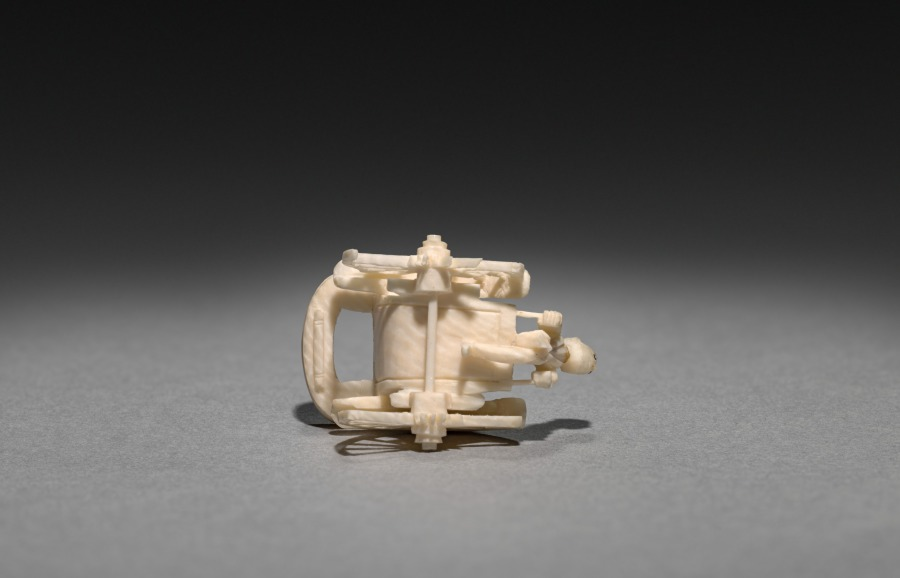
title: Woman in a Jinrikisha (Rickshaw)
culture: Japan, Meiji period (1868–1912)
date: early 1900s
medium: ivory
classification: Ivory